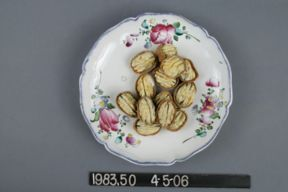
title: Plate of Walnuts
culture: France, Sceaux, 18th century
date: c. 1770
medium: faience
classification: Ceramic